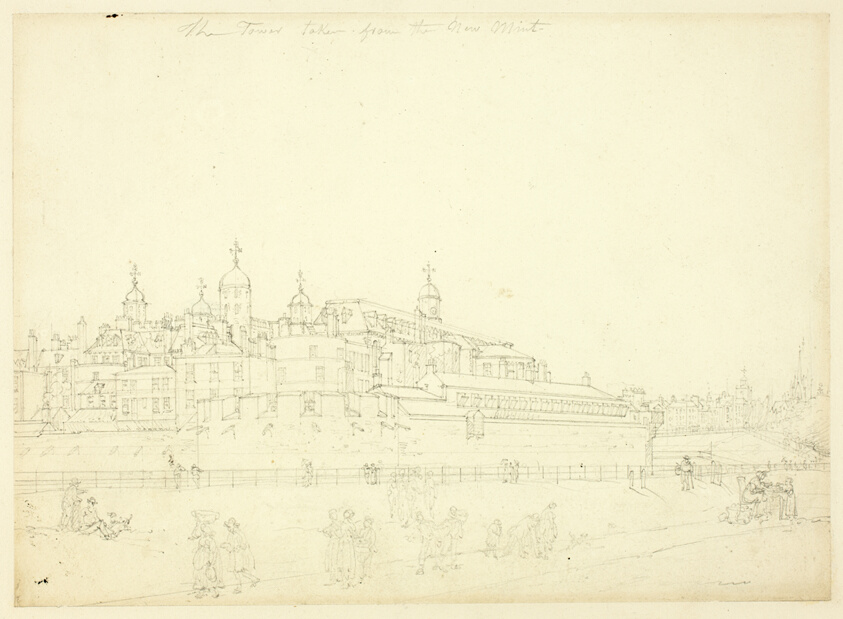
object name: Drawing and Watercolor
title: Study for The Tower Taken from the New Mint, from Microcosm of London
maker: Augustus Charles Pugin (English, born France, 1762-1832); Thomas Rowlandson (English, 1756-1827)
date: c. 1809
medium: Graphite on cream wove paper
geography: England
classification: graphite; drawings (visual works); prints and drawing